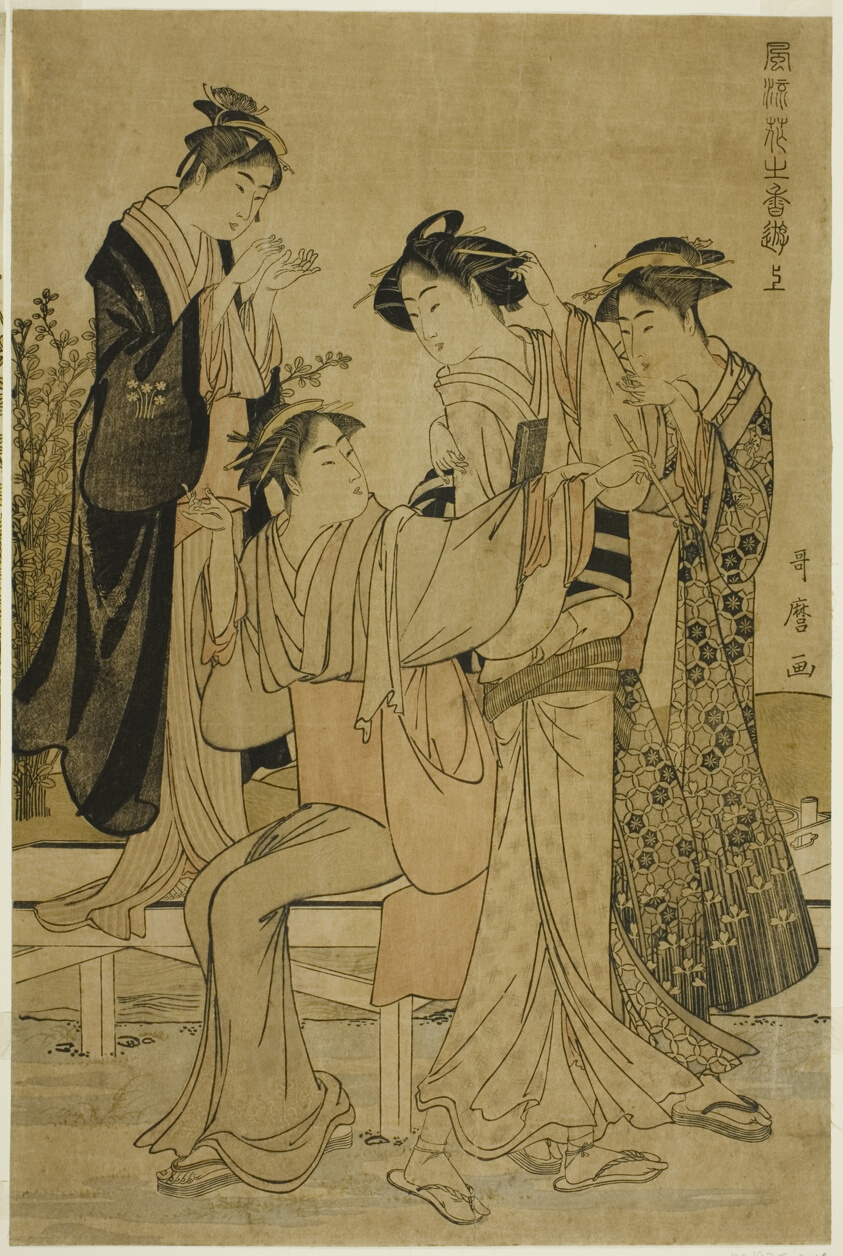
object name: Print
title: Elegant Pleasures: The Scent of Flowers, right (Furyu hana no ka asobi, jo)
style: Japanese (culture or style)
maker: Kitagawa Utamaro 喜多川 歌麿; Japanese, 1753 (?)-1806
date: c. 1783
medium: Color woodblock print; right sheet of oban diptych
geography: Japan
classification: woodblock print; print; asian art